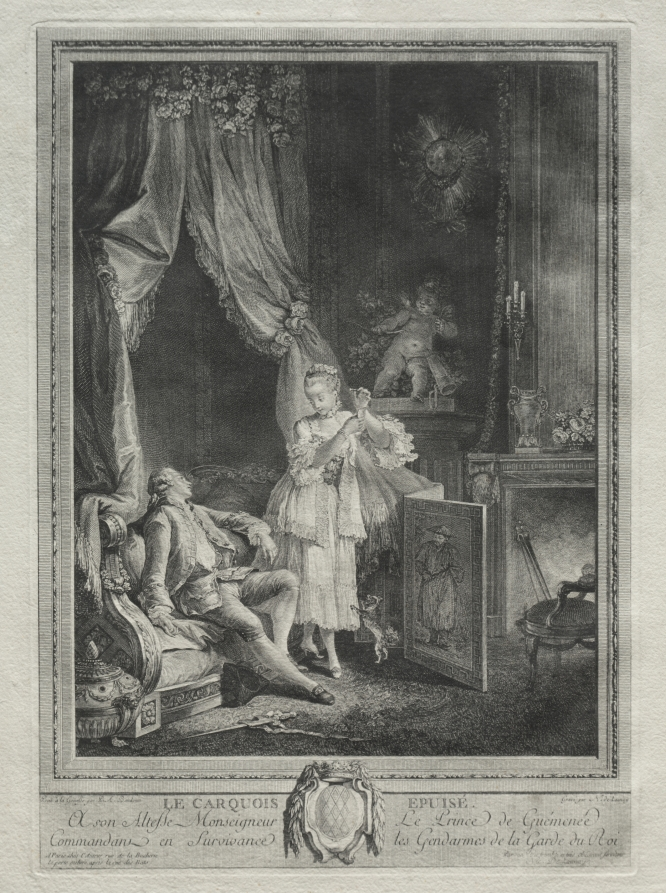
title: The Empty Quiver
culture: France, 18th century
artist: Nicolas Delaunay (French, 1739–1792)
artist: after Pierre-Antoine Baudouin (French, 1723-)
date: c. 1775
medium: engraving and etching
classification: Print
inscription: On plate, in margin on bottom, below left corner: "Peint à la Gouasse par P.A. Baudouin"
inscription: On plate at margin on right: "Gravé par N. de Launay (flanked by a coat of arms)/LE CAQUOIS EUPISE. A son Altesse Monseigneur Le Prince de Guémenée Commandant en Survivace les Gendarmes de la Garde du Roi"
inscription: In extreme lower left corner: "A Paris chèz l'Auteur rue de la Bucherie la porte cochere après la rue des Rats"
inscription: In extreme lower right corner: "Par son très humble et très obeissant Serviteur Nic. De Launay"